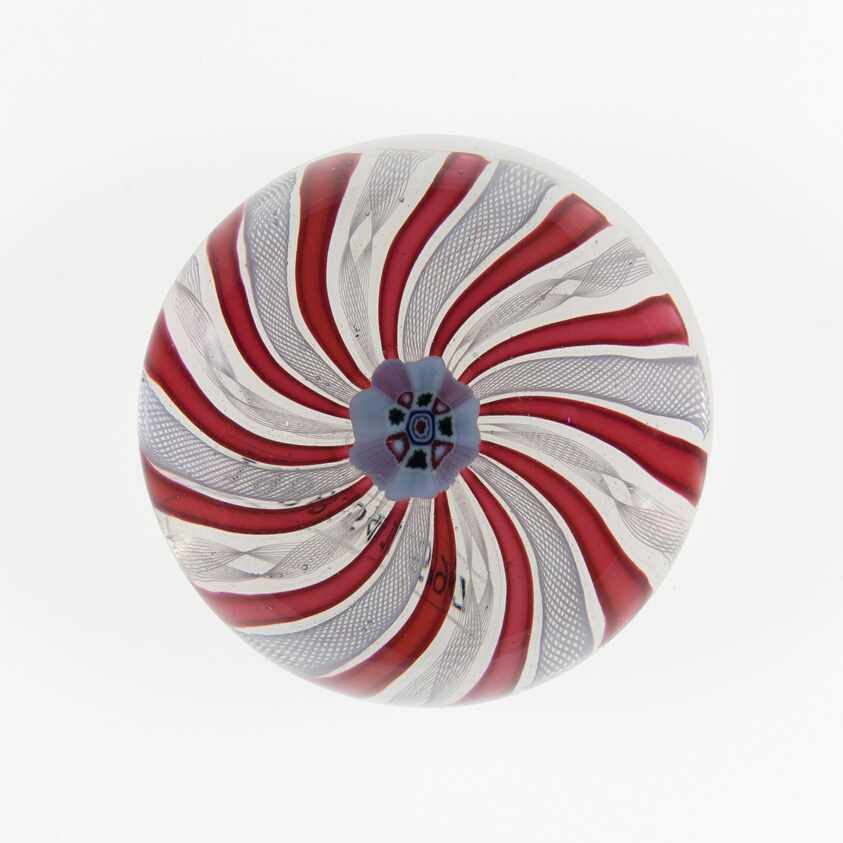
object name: Glass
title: Paperweight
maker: Clichy Glassworks (Cristalleries de Clichy); Clichy, France, 1837-1885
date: c. 1845–60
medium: Glass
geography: Clichy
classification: paperweight; glass